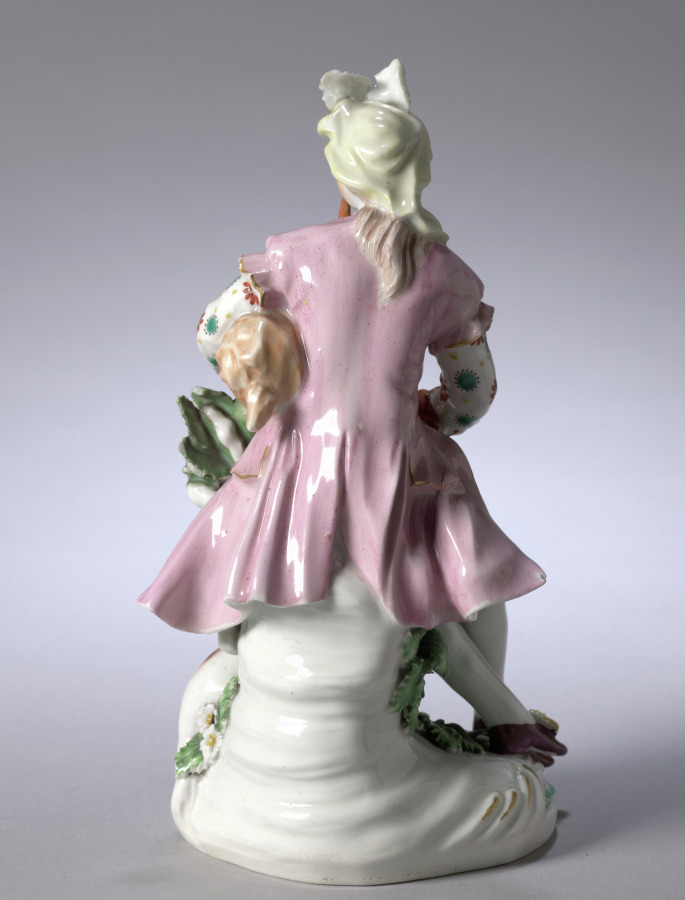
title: Seated Musician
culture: England, Derby, 18th century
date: c. 1765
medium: soft-paste porcelain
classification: Ceramic